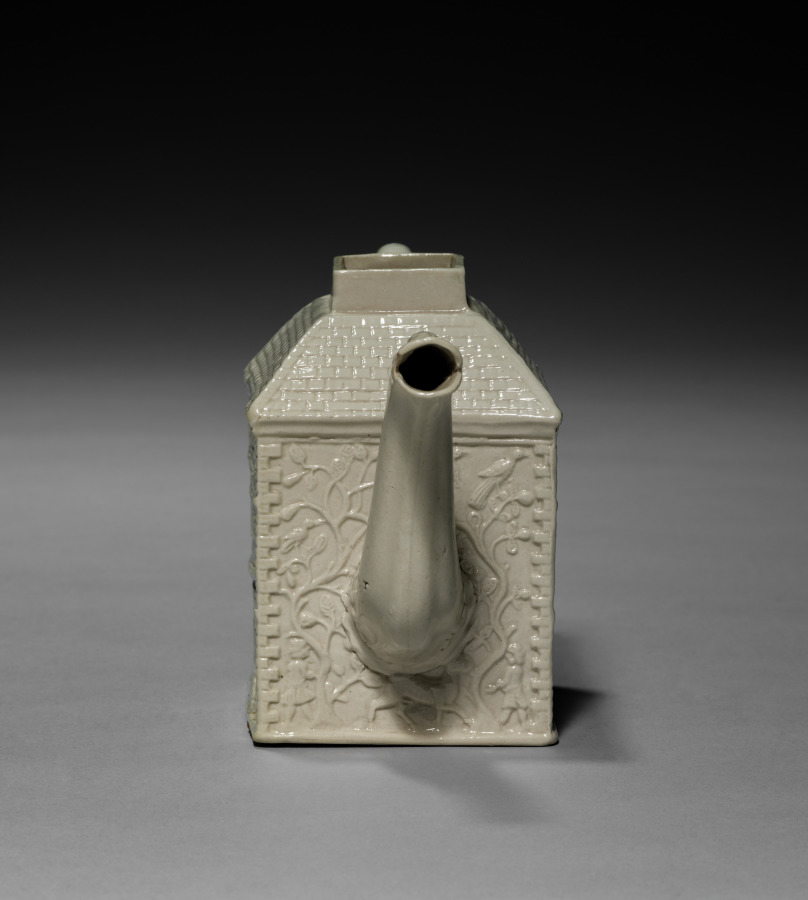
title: Teapot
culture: England, Staffordshire, 18th century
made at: Staffordshire Factory (British)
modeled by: Aaron Wood (British)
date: 1740–1750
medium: salt-glazed earthenware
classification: Ceramic